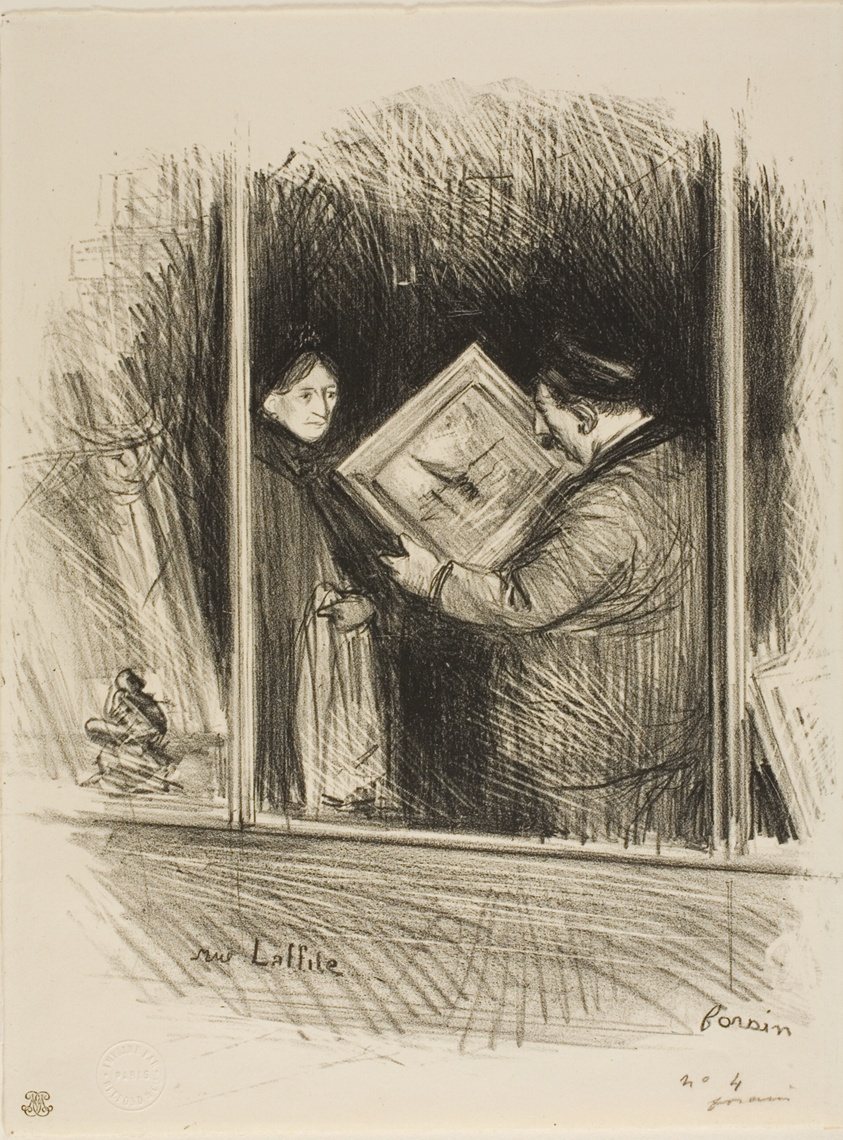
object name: Print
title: Laffitte Street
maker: Jean Louis Forain (French, 1852-1931)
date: c. 1892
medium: Lithograph on ivory wove paper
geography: France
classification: lithograph; print; prints and drawing